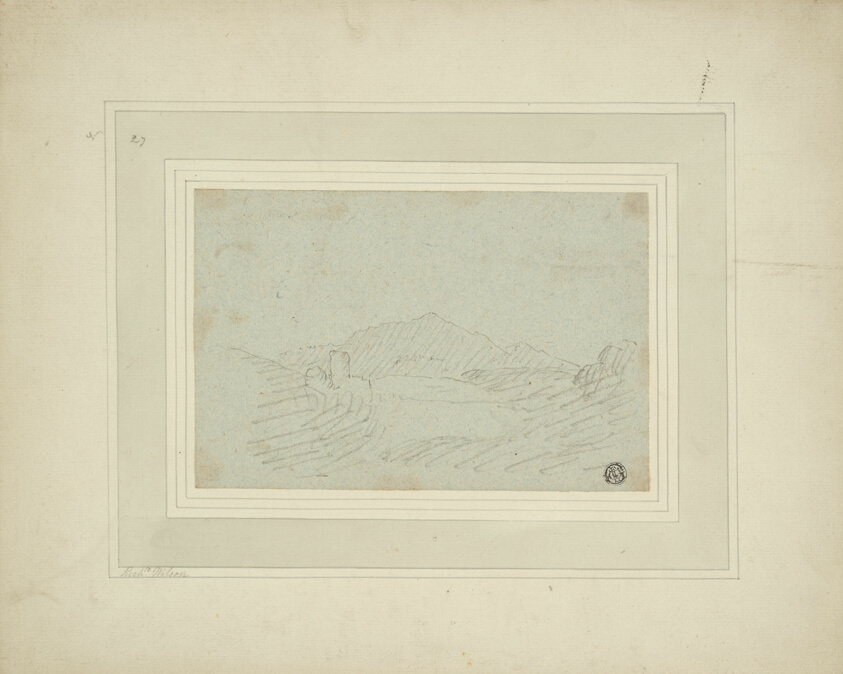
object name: Drawing and Watercolor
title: Ruins in a Mountainous Country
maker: Attributed to Richard Wilson; English, 1714-1782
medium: Charcoal on blue laid paper, laid down on ivory laid paper, laid down on ivory laid paper (2 layers)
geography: England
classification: charcoal; drawings (visual works); prints and drawing